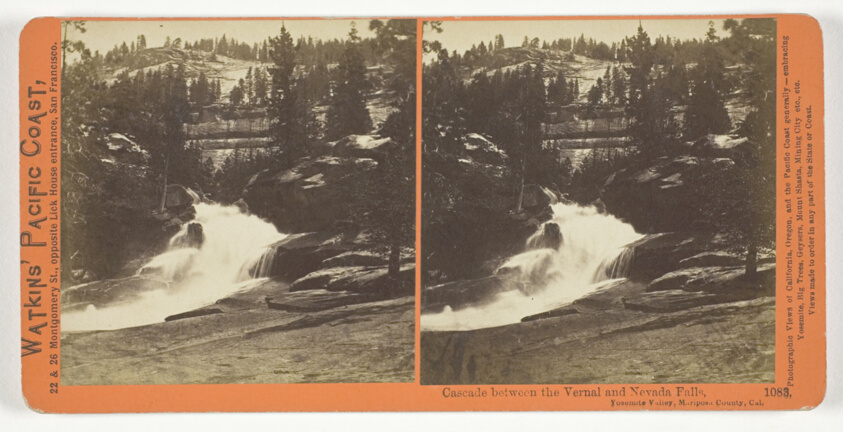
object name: Photograph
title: Cascade Between the Vernal and the Nevada Falls, Yosemite Valley, Mariposa County, Cal., No. 1083 from the series "Watkins' Pacific Coast"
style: 19th century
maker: Carleton E. Watkins; American, 1829-1916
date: 1861/76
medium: Albumen print, stereo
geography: United States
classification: stereograph (albumen); albumen silver print; photographic process; photography; photograph